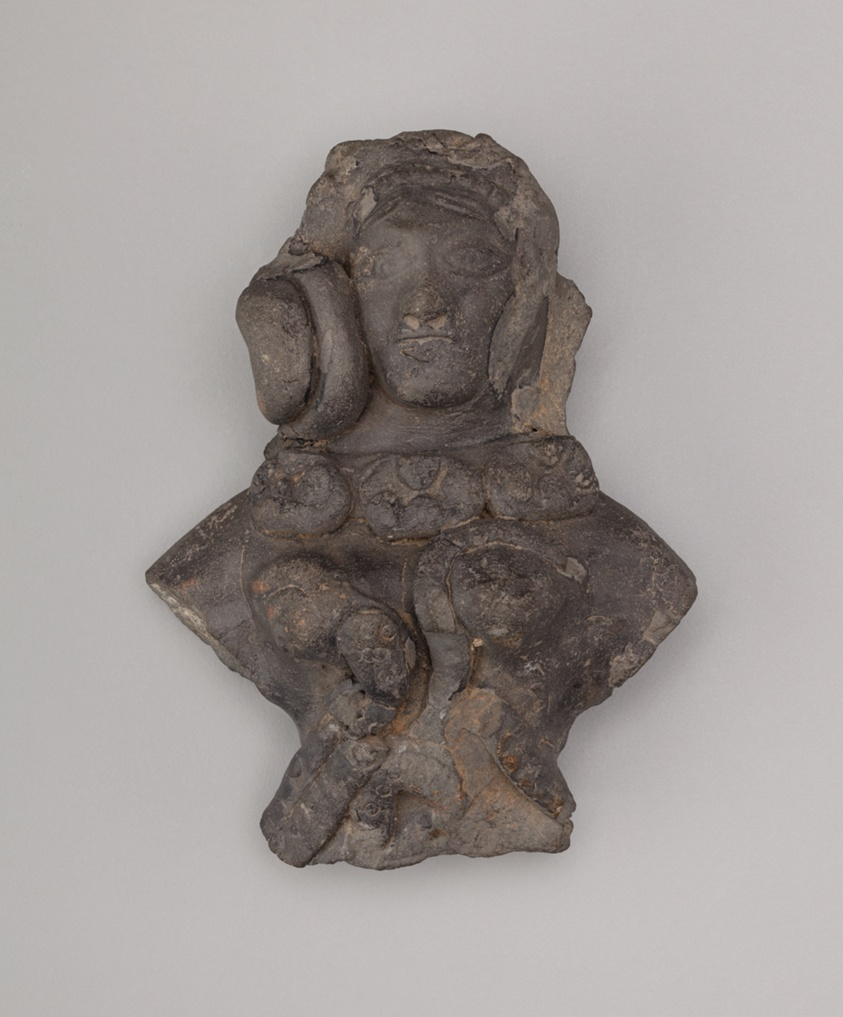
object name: Sculpture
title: Torso of a Female Figurine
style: South Asian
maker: India; Uttar Pradesh, Mathura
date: Mauryan period, 3rd/2nd century B.C.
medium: Hand-modeled gray terracotta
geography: Mathura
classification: earthenware; ceramics; sculpture; asian art